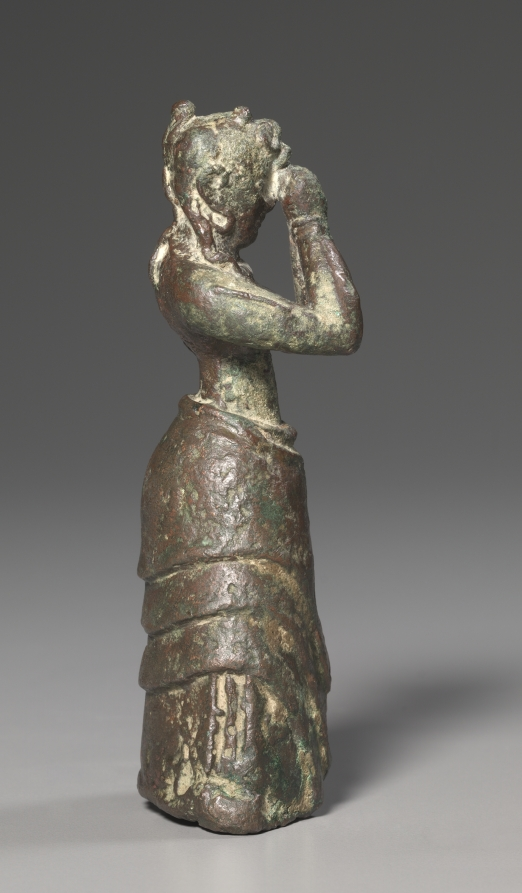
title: Female Worshiper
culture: Crete, Minoan, middle Minoan III–late Minoan I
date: c. 1600–1500 BCE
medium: bronze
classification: Sculpture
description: This extremely rare Minoan bronze statuette represents a girl worshiping a deity. It was probably left as a dedication to a divinity. She wears a flounced skirt over a sleeved robe open at the front. The figure shows a remarkable degree of detail, including looped earrings, bracelets, and a necklace. Her shaved hairstyle, not found on any other Minoan bronze statuette, matches that of painted figures in roughly contemporary frescoes uncovered on the island of Thera, north of Crete. Its excellent condition, rarity, fine detail, and balanced proportions set it apart from other statuettes of its type to have survived.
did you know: The shaved head with prominent locks of hair indicates that this female votive figure is an adolescent.